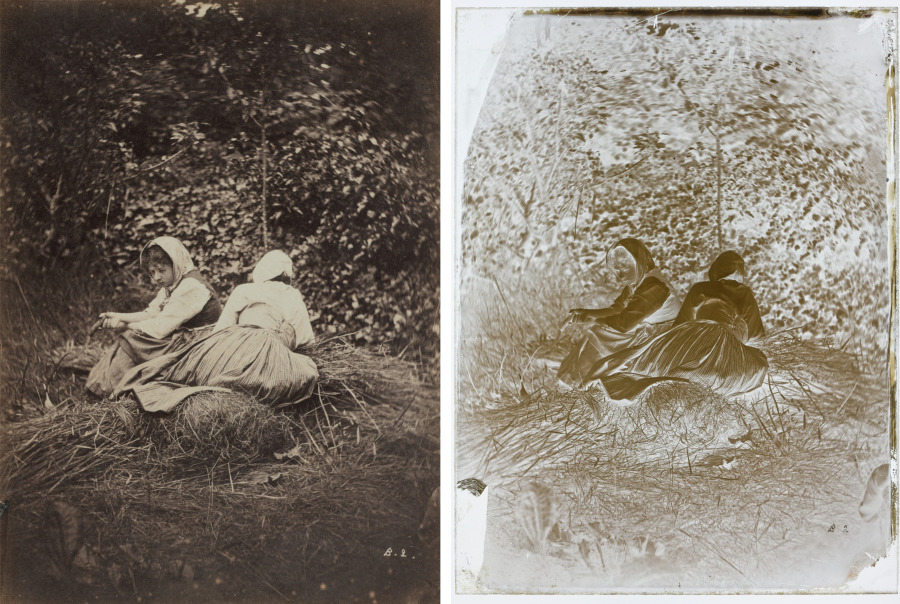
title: Two Peasant Girls Seated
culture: France, 19th century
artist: Auguste Giraudon's Artist (French)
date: 1870s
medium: glass negative and albumen print from wet collodion negative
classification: Photograph